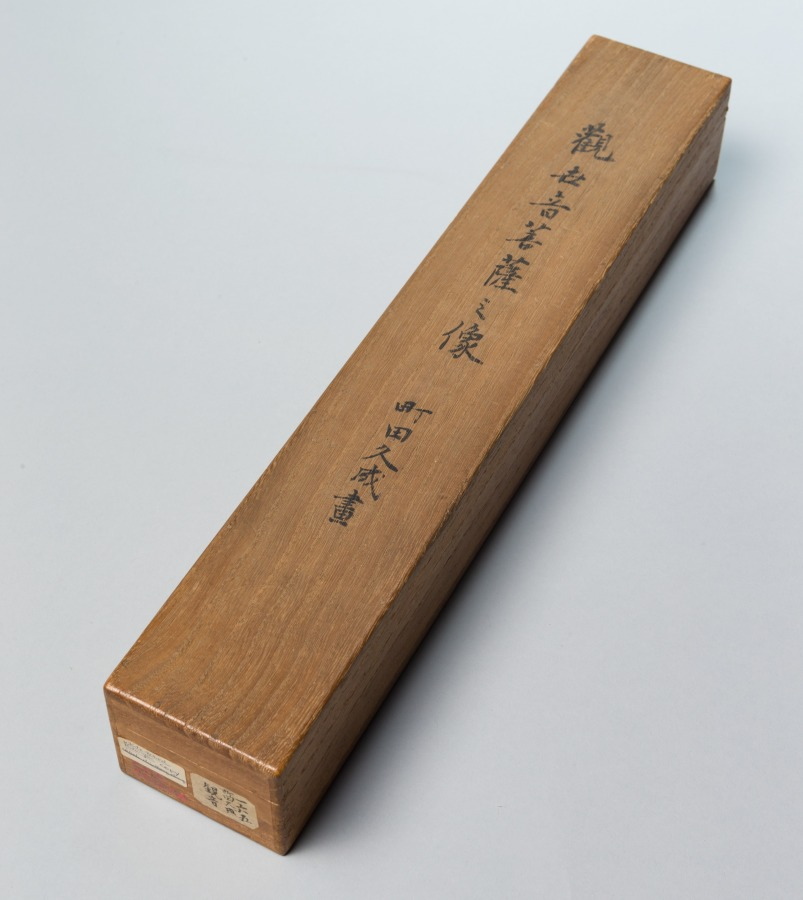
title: White-Robed Guanyin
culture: China, Yuan dynasty (1271-1368)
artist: copy after Jueji Yongzhong (Chinese, active around 1300)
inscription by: Zhongfeng Mingben (Chinese, 1263–1323)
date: late 1200s–early 1300s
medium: hanging scroll; ink and gold on silk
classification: Painting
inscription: Inscription: one of the 84,000 painted by the priest Insei.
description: The original model for this ink drawing of Guanyin, the bodhisattva of infinite compassion (Avalokiteshvara in Sanskrit), is CMA 1978.47.1. This drawing is a later copy with the same image of the White-Robed Guanyin, but in reverse. The inscription above reads: one of the 84,000 painted by the priest Insei. The inscription seems to indicate that the Japanese priest Insei repeatedly copied the image of the bodhisattva in an act of piety and to accumulate merit, as is promised in the Lotus Sutra for anyone who paints images of the Buddha, they “will achieve the Buddha path.” The priest’s name and seal need further study and identification.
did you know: The bodhisattva's face and halo were delicately painted in gold.